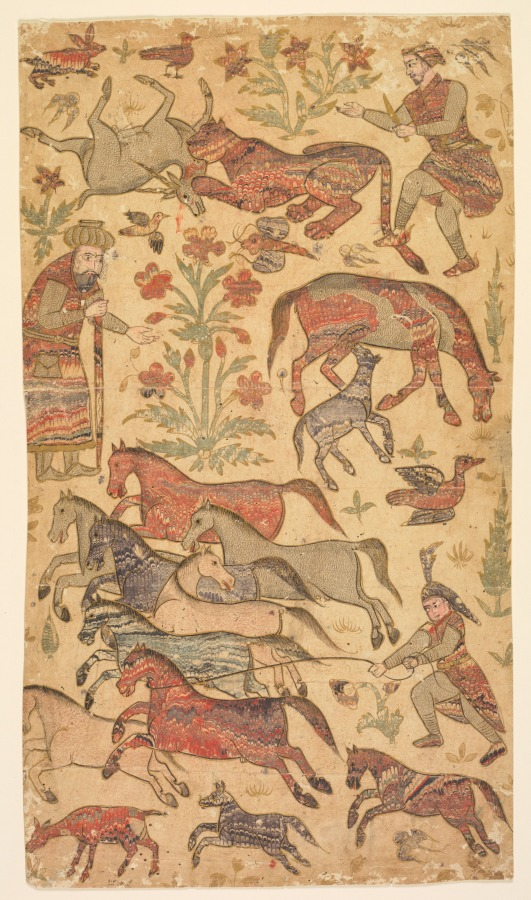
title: A marbled picture of Rustam catching Rakhsh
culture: India, Bijapur, Deccan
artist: attributed to Shafi (Indian, active about 1650)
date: c. 1650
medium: Gum tempera and gold on paper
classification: Painting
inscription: apocryphal inscription lower left: 'amal-i mir Kalan 904 verso: inscription identifying the scene of Rustam capturing Rakhsh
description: This scene depicts the young hero Rustam catching a foal, Rakhsh (meaning “light”), who will be his faithful companion through many adventures. A prophet-like shepherd figure with a staff at the upper left predicts that Rustam will be the savior of Iran. At the top of the page a feline has caught its prey, while a hunter steps on its tail. This extraordinary painting has more applications of marbled colorant than any other known example. Even all the flowers and birds have been articulated through marbling in a feat of registration and control by a master of the technique.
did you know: Even the flowers and insects used as filler in this composition were marbled.